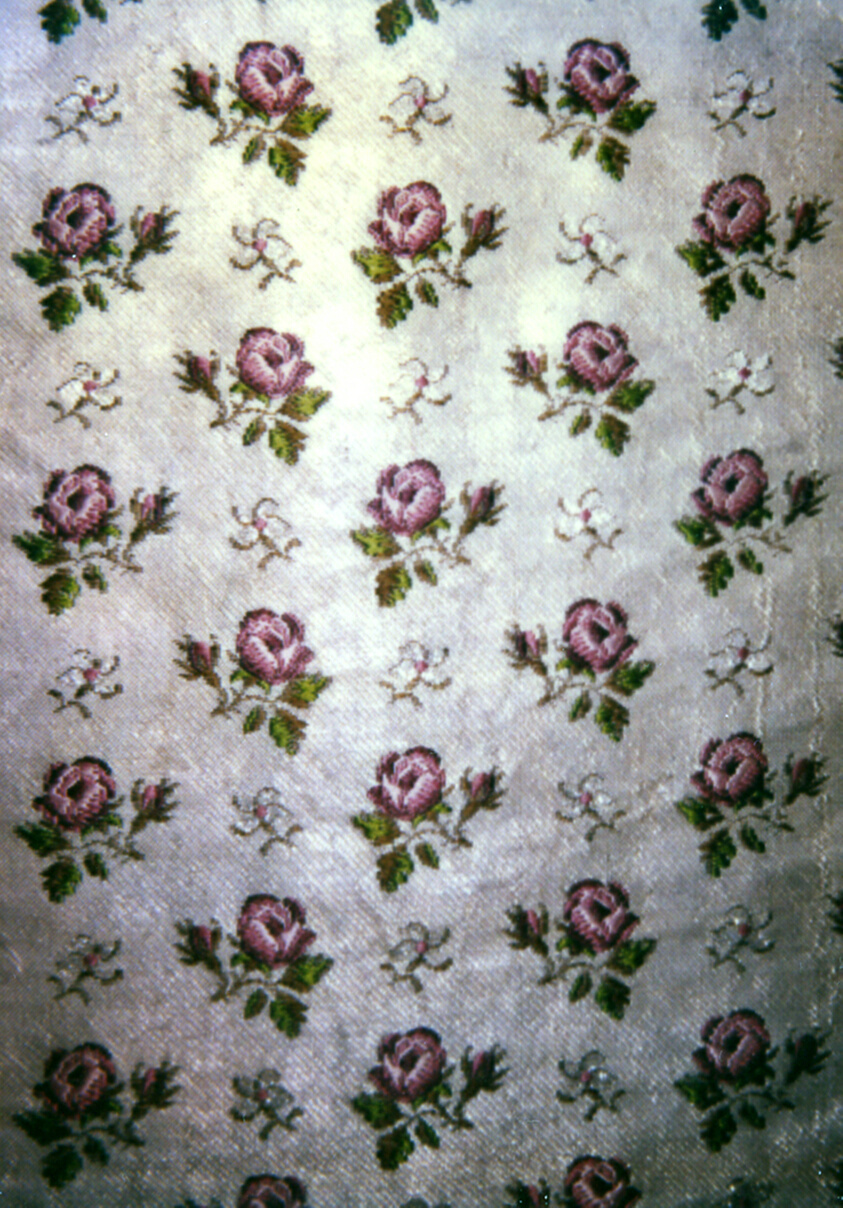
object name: Textile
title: Panel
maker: England or France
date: c. 1820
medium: Silk and silvered-metal-strip-wrapped silk, and silvered-metal strips, plain weave with supplementary brocading wefts and plain and twill interlacings of secondary binding warps and supplementary facing and patterning wefts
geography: England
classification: textile; weaving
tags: flowers